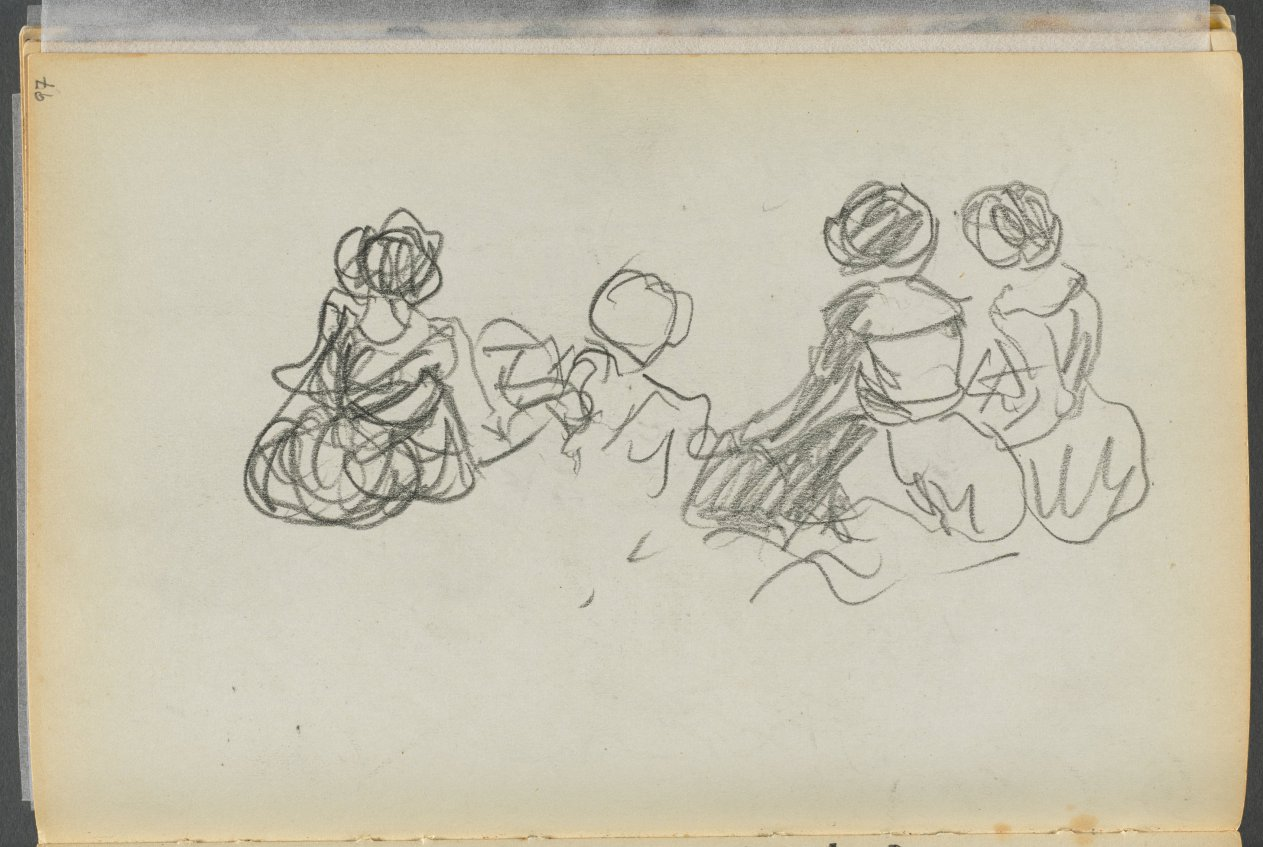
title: Sketchbook- The Granite Shore Hotel, Rockport, page 097: Seated Female Figures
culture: America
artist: Maurice Prendergast (American, born Newfoundland [now Canada], 1858–1924)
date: 1905–10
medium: graphite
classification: Bound Volume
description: This sketchbook contains 72 pages of pencil drawings and 9 watercolors of Cape Ann. On the inside of the cover Prendergast wrote the address of the Granite Shore Hotel in Rockport, Massachusetts.